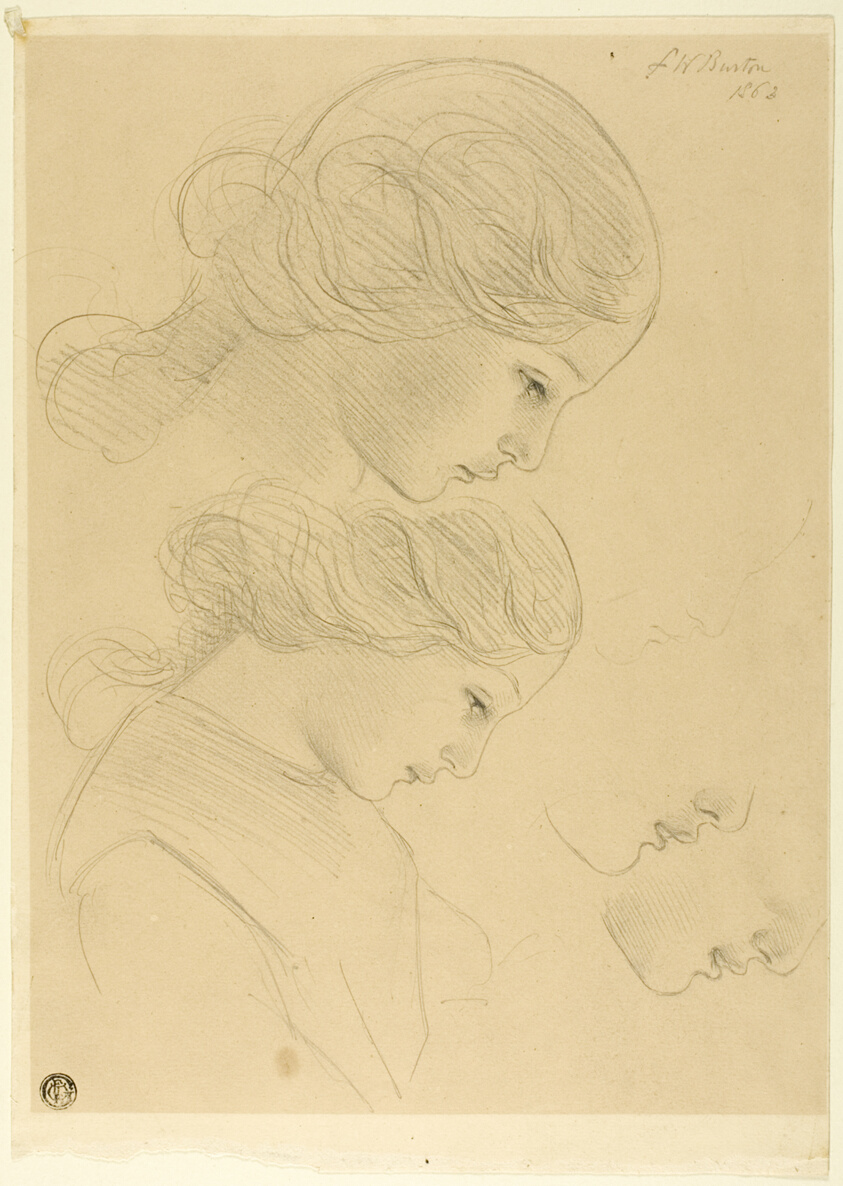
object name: Drawing and Watercolor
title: Sketches of Woman's Profile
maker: Frederick William Burton (Irish, 1816-1900)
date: 1863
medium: Black crayon on buff wove paper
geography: Ireland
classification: crayon; drawings (visual works); prints and drawing